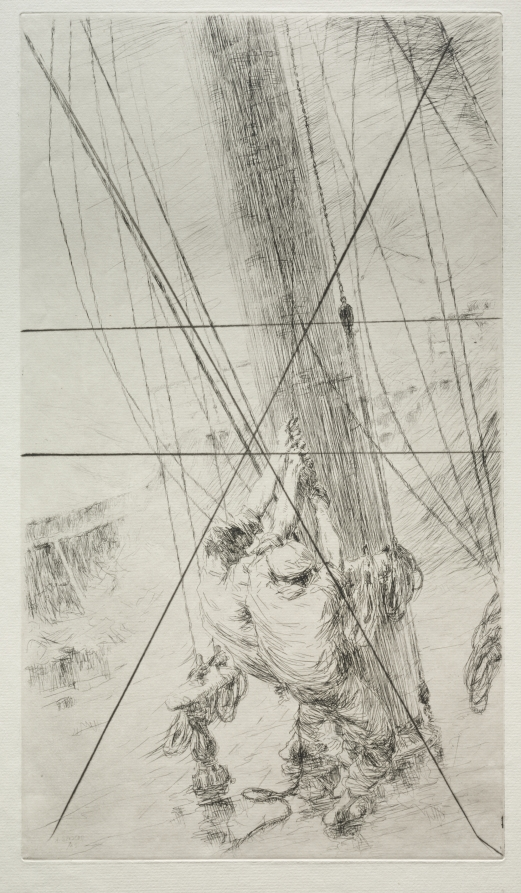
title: Clewlines and Buntlines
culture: England, 20th century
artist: Arthur John Trevor Briscoe (British, 1873–1943)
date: 1925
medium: etching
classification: Print